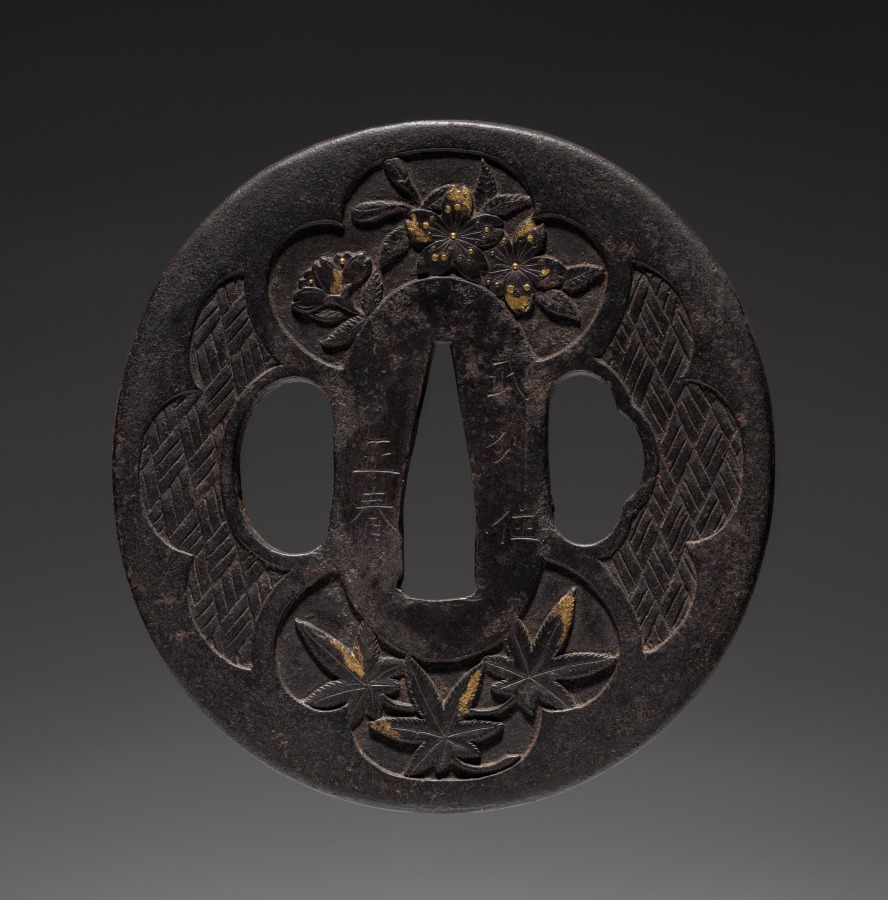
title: Sword Guard (Tsuba)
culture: Japan, Edo period (1615–1868)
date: mid-1800s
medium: iron (Ito type)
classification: Arms and Armor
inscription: signed "Masaharu, residing in Musashi province."